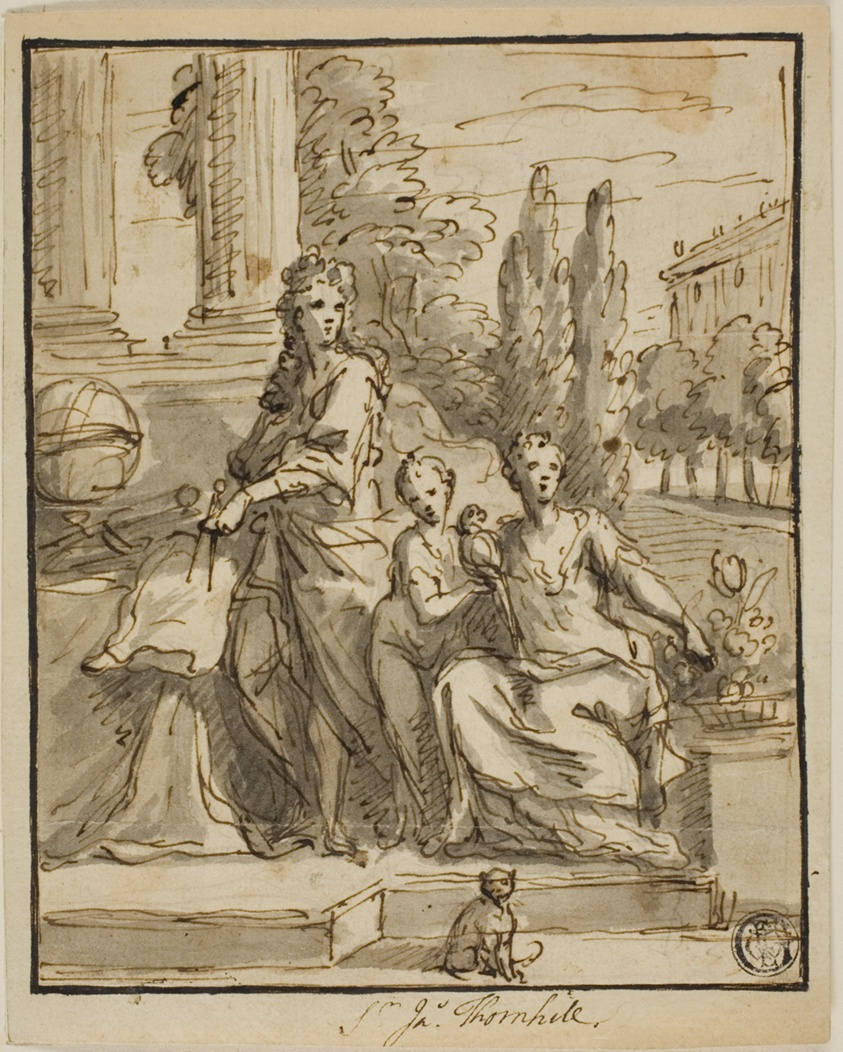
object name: Drawing and Watercolor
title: Portrait of a Geographer, Wife, and Child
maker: James Thornhill (English, 1675-1734)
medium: Pen and brown ink with brush and gray wash, over traces of graphite, on ivory laid paper, laid down on ivory laid paper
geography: England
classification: pen and ink drawings; drawings (visual works); prints and drawing